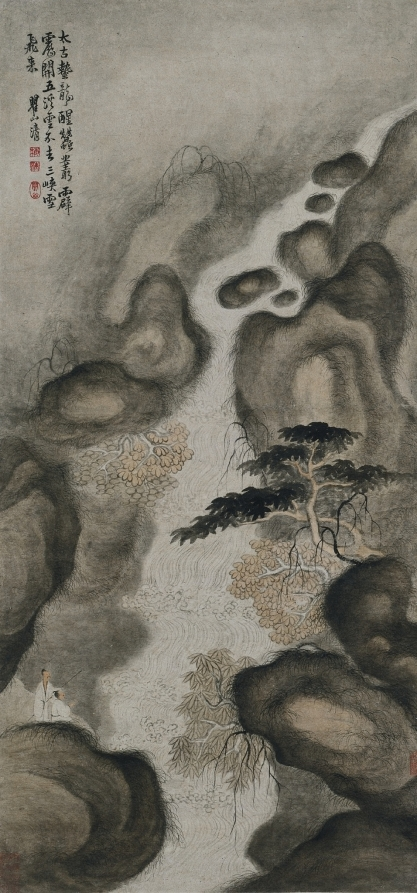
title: Nine Dragon Pool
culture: China, Qing dynasty (1644-1911)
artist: Mei Qing (Chinese, 1623–1697)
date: 1690s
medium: hanging scroll, ink and light color on paper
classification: Painting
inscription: 太古蟄龍醒，蠺叢霹靂開。 五溪雲不去，三峽雪飛來。 瞿山, 清。 [印] 梅清; 淵公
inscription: 2 additional seals: 1 of Dai Xi 戴煕 (1801–1860); 1 unidentified.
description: In the second half of the 1600s, Huangshan 黃山 (Mt. Huang or Yellow Mountain) attracted many visitors and inspired artists like Mei Qing. He probably sketched the Nine Dragon Pool on his second trip to the mountain range in 1690, at the advanced age of 68 sui. This dramatic waterfall has nine curves, each forming an emerald green pool. After heavy rain, the rushing water looks like nine white dragons.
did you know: Huangshan 黃山 is a UNESCO World Heritage site known for its spectacular rocky peaks, sea of clouds, oddly shaped pine trees, and hot springs.